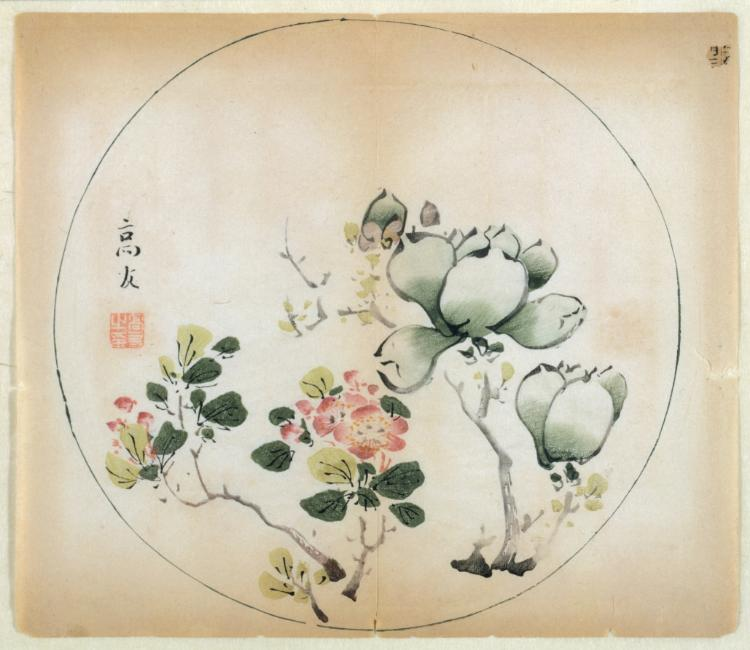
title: Flowering Magnolia and Peach Blossoms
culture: China, Ming dynasty (1368-1644) or later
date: 1368–1644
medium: color woodblock print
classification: Print